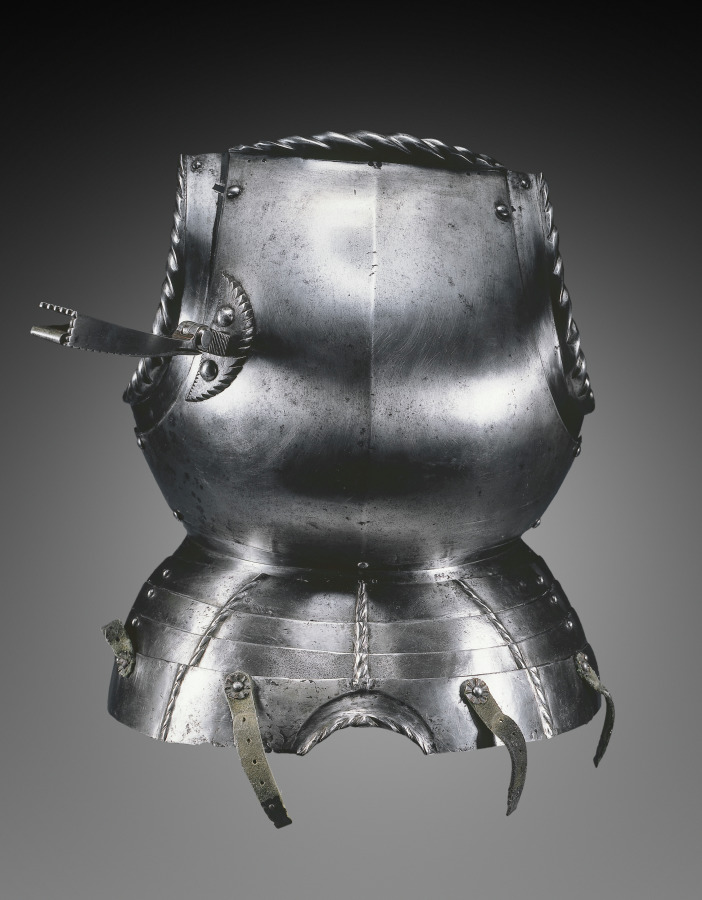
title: Breastplate (with lance rest and fauld/ Nuremberg)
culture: Germany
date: c.1510–30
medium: steel with black paint and leather straps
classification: Arms and Armor